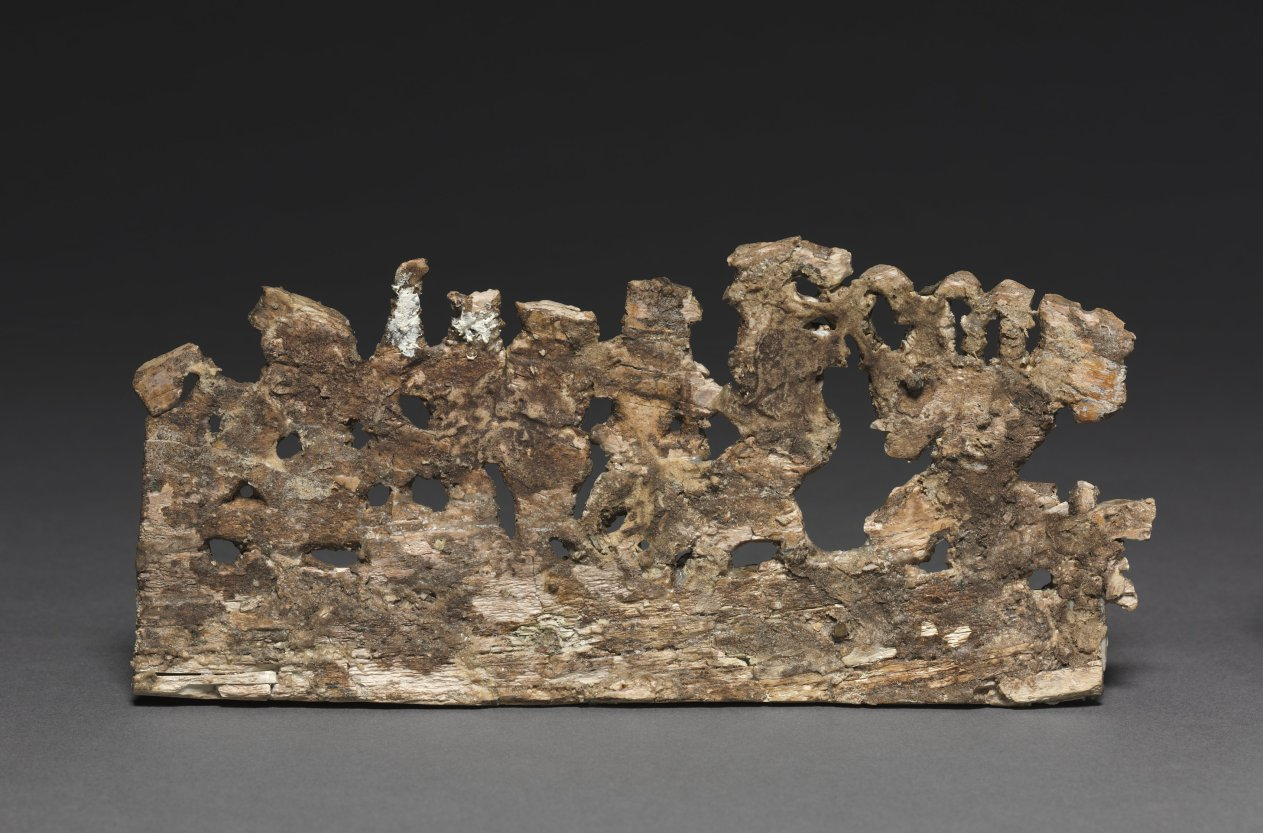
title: Ladies Entertained by Dancers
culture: Afghanistan, Begram, Kushan period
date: 1–200 CE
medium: ivory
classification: Ivory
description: This ivory carving was made to sheath wooden furniture made in India for trade along the Silk Road, which stretched from Rome to China. Indian ivory-faced furnishings--along with lacquer boxes from China and painted glass from Rome--were found in an extraordinary deposit of luxury goods at a site called Begram. The wood on which the ivory and lacquer were affixed has long disintegrated, and only the small pieces remain.